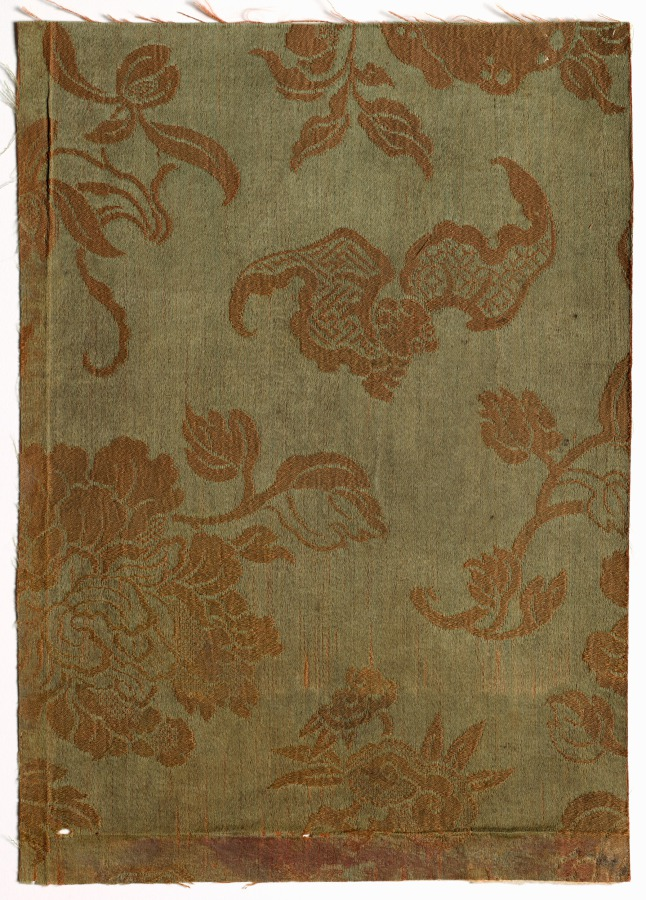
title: Textile Fragment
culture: Japan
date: 1800s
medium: silk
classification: Textile